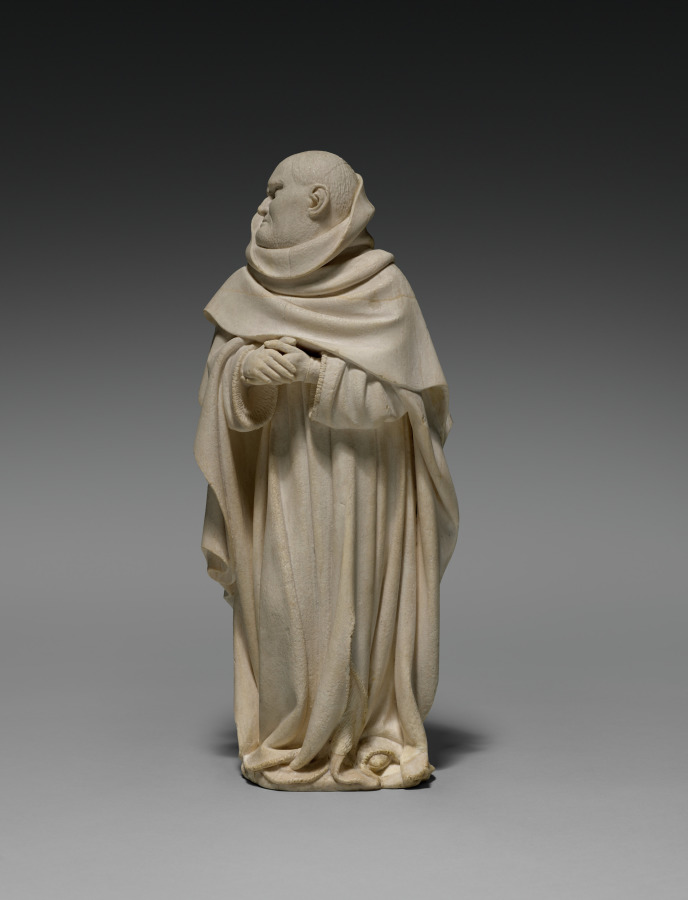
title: Mourner from the Tomb of Philip the Bold, Duke of Burgundy (1364–1404)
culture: Netherlands, active Dijon, 15th century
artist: Claus de Werve (Netherlandish, 1380–1439)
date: 1404–10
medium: vizille alabaster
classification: Sculpture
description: This figure comes from the tomb of Duke Philip the Bold from the church of Champmol near Dijon (Burgundy, France). Philip, who founded the monastery and designated it as his burial place, hired the best artists, many of whom came from the Netherlands. While the commission was given in 1381, the work was not completed until 1410, six years after the duke’s death. This mourner is unusual for the time because it is not carved as a static low relief on the pedestal of the tomb but interact with the viewers and their fellow procession members. The lifelike quality of the figure is due in large part to the alabaster. Its softness allowed artists to carve details into the material, and the transparent, milky white stone could also be polished to a high gloss.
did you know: The use of alabaster in the late Middle Ages began in the 1300s with court art in the circles of French kings, especially in the field of funerary sculpture.